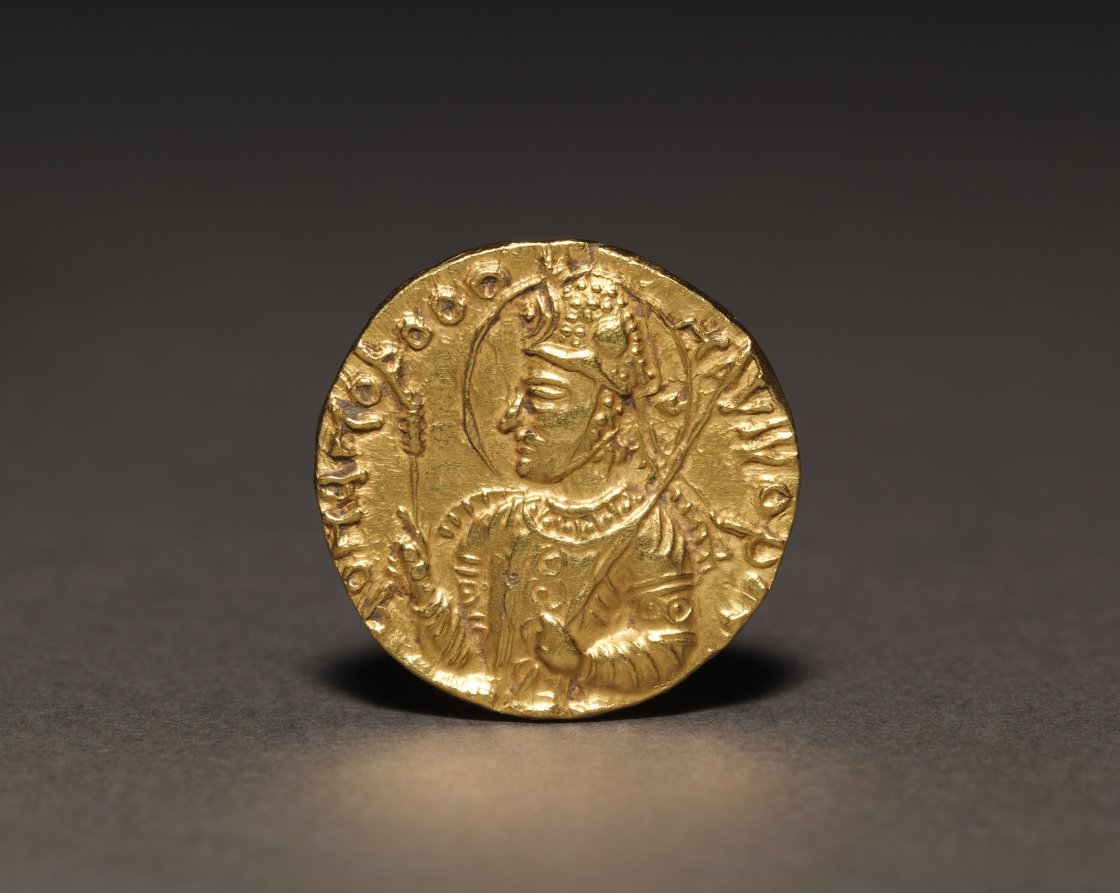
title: Coin: Havishka (obverse)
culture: India, Mathura, Kushan period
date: c. 106–149 CE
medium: gold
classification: Coins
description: This gold coin represents the reign of the Kushana ruler, Havishka. The coin bears a portrait of the ruler on the obverse and various deities on the reverse. It is identified by inscriptions in Kharosthi, the language used in northwestern India during the Kushan period.